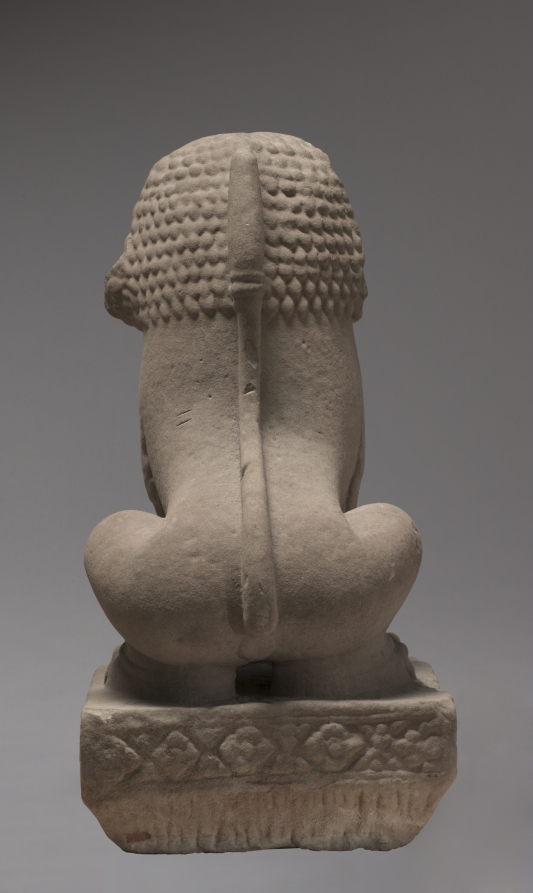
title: Lion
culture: Cambodia, Khmer, Angkorean period (877-1431)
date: 1100s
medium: stone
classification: Sculpture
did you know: Lions were not native to Cambodia.